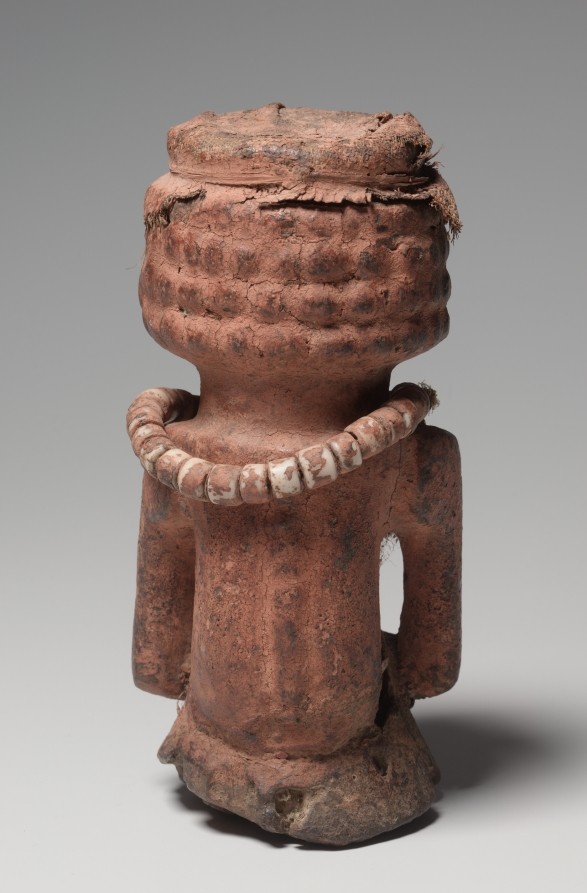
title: Figure (Nkishi)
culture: Africa, Central Africa, Democratic Republic of Congo, Luba-style maker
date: late 1800s–early 1900s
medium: Wood, organic materials (including resin and soil), plant fiber, and glass beads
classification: Sculpture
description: The substances contained in its cloth-covered cranial cavity indicate that this half-figure belongs to the broad category of charms or “power objects” that the Luba call mankishi. It was used by a ritual expert and functioned in a variety of rituals dealing with healing, protection, divination, or jurisdiction. Often such power figures were carved by the ritual experts rather than by professional artists.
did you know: Unlike most Luba arts, this figure is not connected to the royal court.